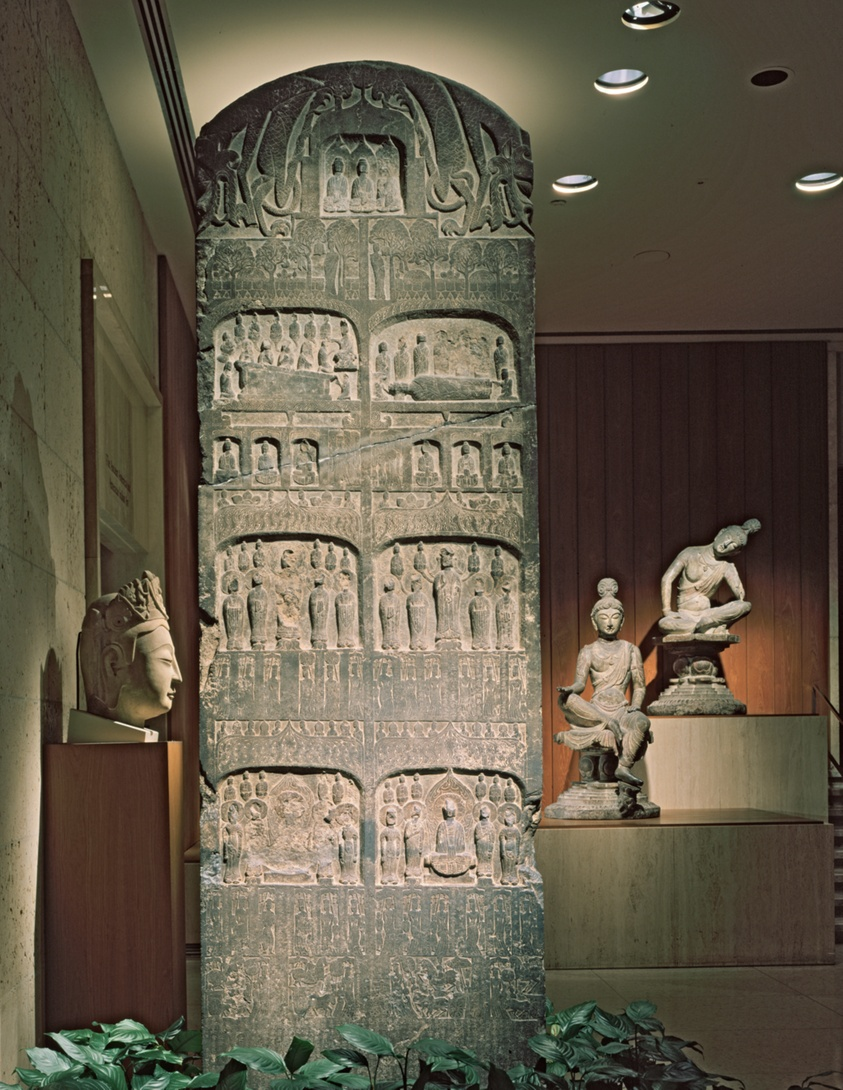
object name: Religious/Ritual Object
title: Buddhist Votive Stele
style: Chinese (culture or style)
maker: China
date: Western Wei dynasty (A.D. 535–557), dated A.D. 551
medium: Stone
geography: China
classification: stone (unidentified); stone; sculpture; asian art; ritual objects